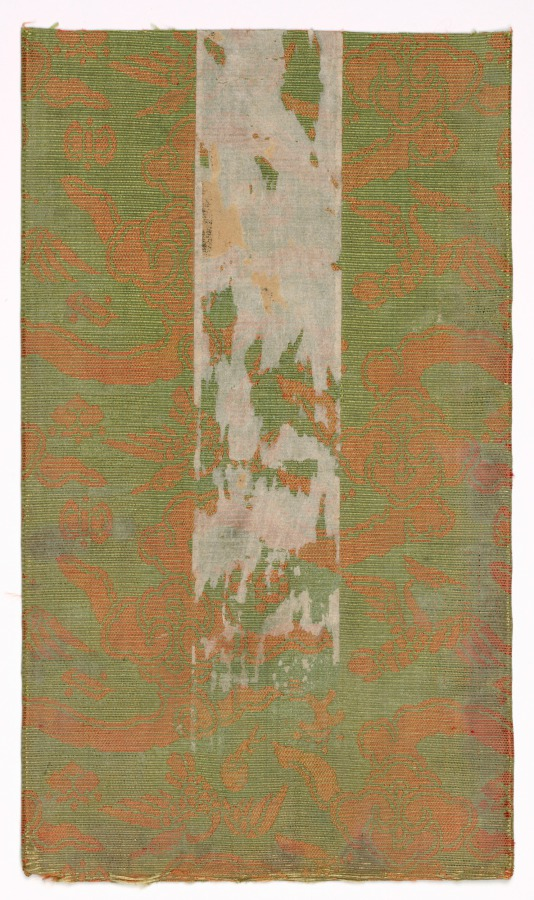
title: Book Cover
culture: China, Qing dynasty (1644-1911)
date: 1680–1720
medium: silk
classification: Textile